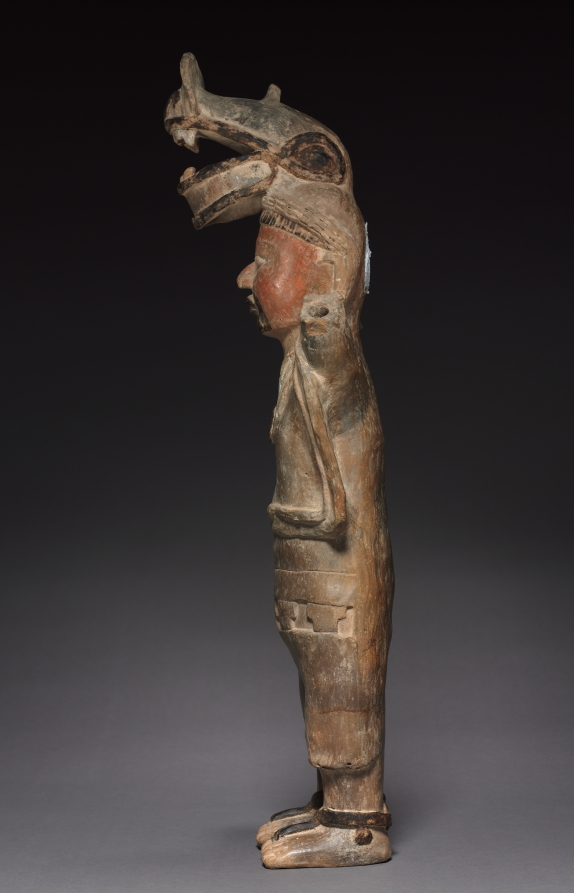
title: Standing Female Figure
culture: Mexico, Veracruz, Veracruz Monumental Sculpture type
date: 600–900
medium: burnished pottery with orange slip, traces of red and white pigment, and asphalt paint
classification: Sculpture